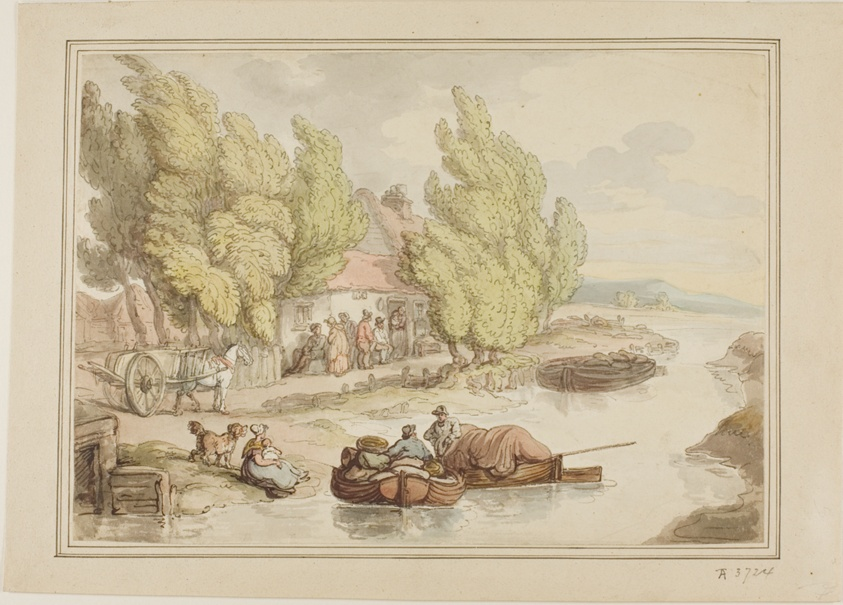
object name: Drawing and Watercolor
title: Village on the River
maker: Thomas Rowlandson (English, 1756-1827)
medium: Pen and brown and gray ink with brush and watercolor, over graphite, on ivory wove paper, laid down on tan wove paper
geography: England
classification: watercolor; drawings (visual works); prints and drawing